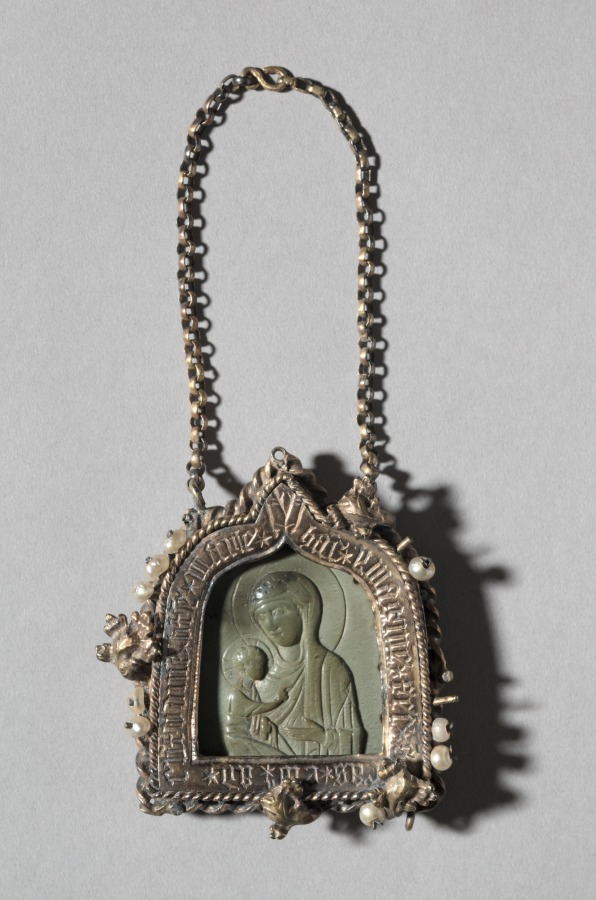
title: Pendant Icon with the Virgin "Dexiokratousa" and Frame with Winged Bull of Saint Luke on the back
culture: Byzantium (pendant); Germany, Aachen (frame), Byzantine period, 12th century (pendant); Byzantine period, 14th century (frame)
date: pendant 1100s; frame mid-1300s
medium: steatite, gilt silver, pearls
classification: Glyptic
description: This small-scale Byzantine icon depicts a half-length figure of the Virgin holding the Christ child. When the icon was mounted in its present frame by a German artist in the 14th century, it was considered to be an authentic portrait painted by Saint Luke. This claim, made in an inscription on the frame, is further emphasized by the ox, Saint Luke’s symbol, engraved on the frame’s reverse.